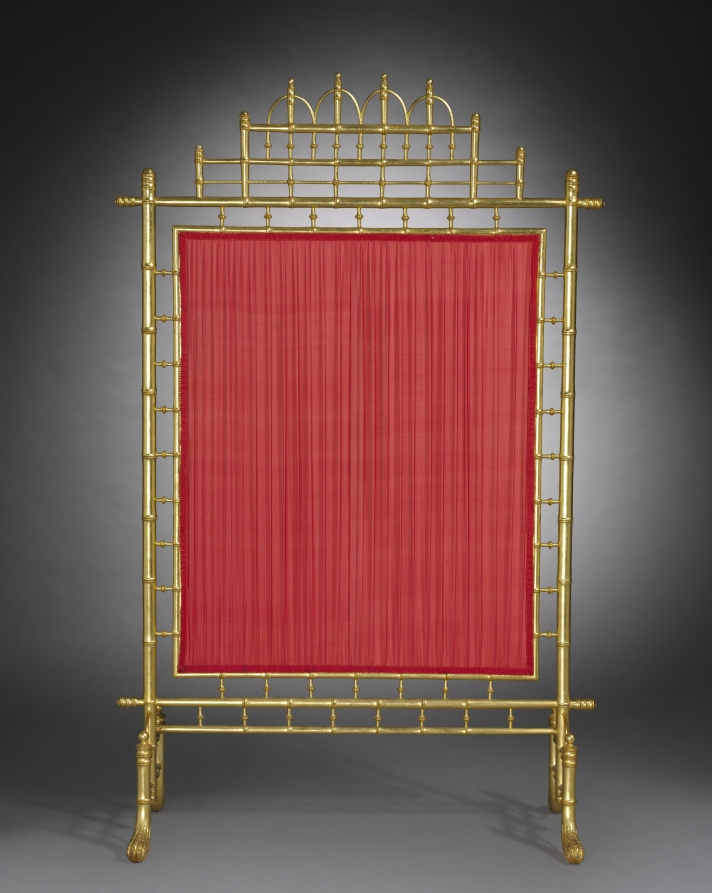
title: Fire Screen with Shell-Matching Game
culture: France, 19th century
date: c. 1870–80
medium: Gilt wood frame with embroidered silk gift cover mounted as a panel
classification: Furniture and woodwork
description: This screen shielded sitters from the heat of a fireplace. The panel incorporates a Japanese cloth gift cover (fukusa), demonstrating the 19th-century fashion in France for Japanese aesthetics. The French frame is carved to resemble bamboo. In Japan, people traditionally draped fukusa over gifts, selecting designs relevant to the occasion. The lids of the hexagonal lacquer game-piece boxes have a crane in clouds and a tortoise in waves, both symbols of longevity. Wedding gift sets often included shell-matching games like the one depicted here. Only the two halves of a specific clamshell can be perfectly matched; game players used the shells’ interior paintings as clues. Games were sometimes painted with episodes from literature, such as the Tale of Genji.